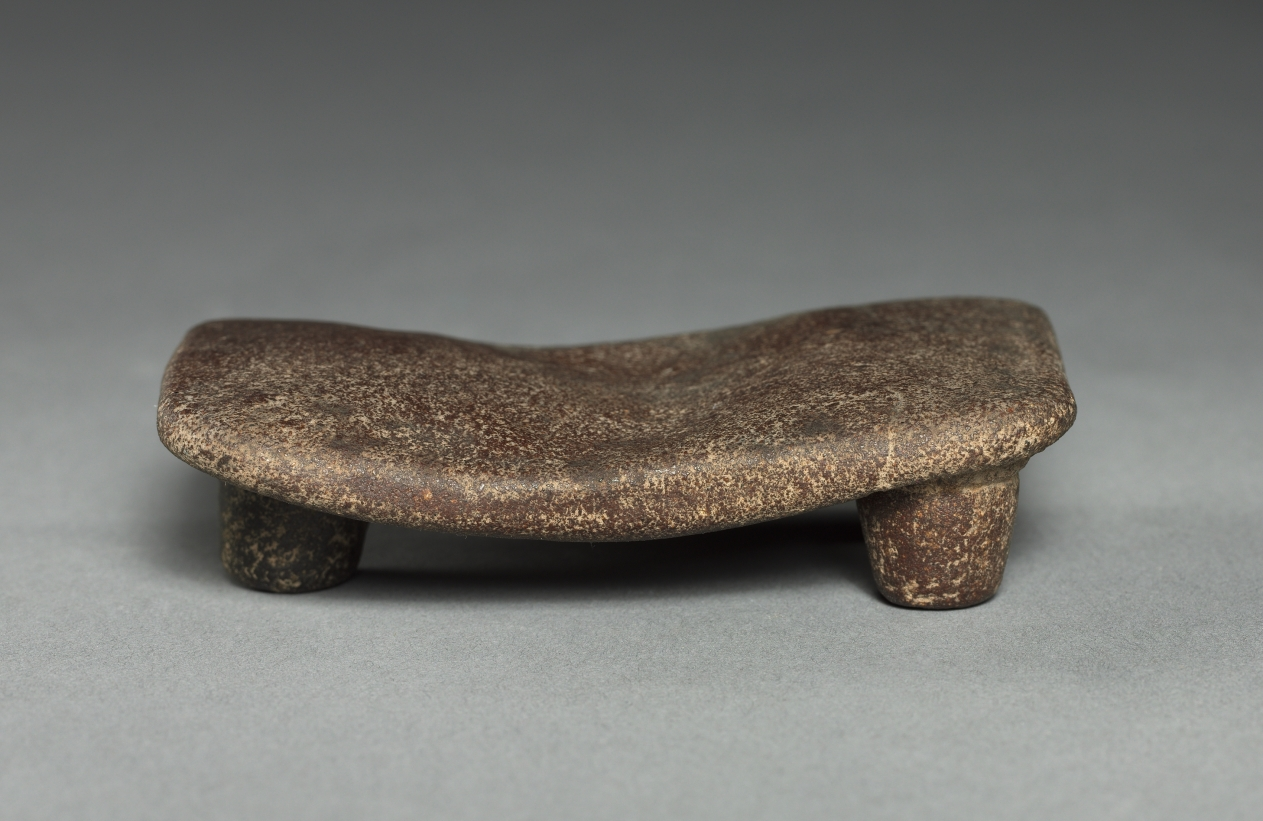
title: Toy Stone for Grinding Grain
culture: Mexico, Valley of Mexico (?), Aztec (?)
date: before 1929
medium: pottery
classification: Ceramic